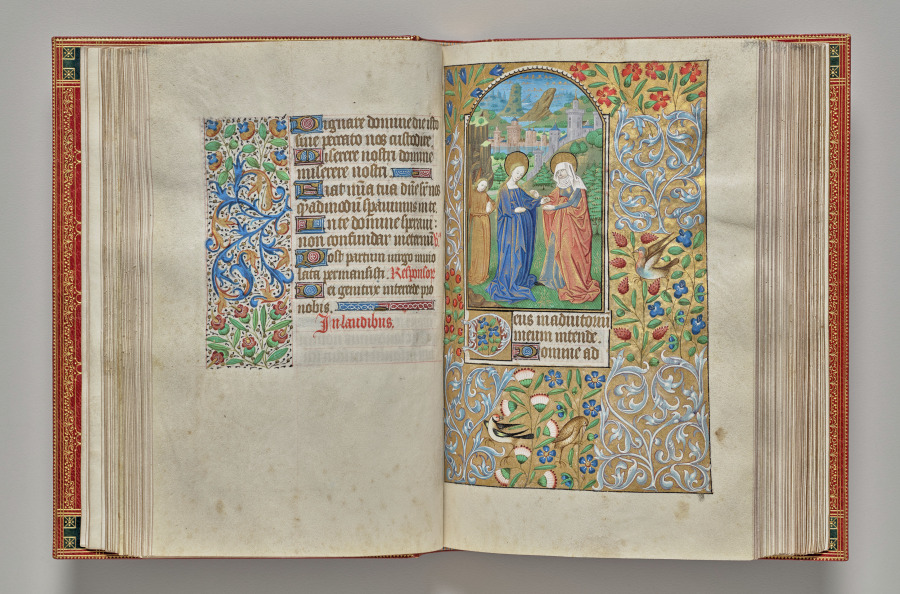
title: Book of Hours (Use of Rouen): fol. 38v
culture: France, Rouen, 15th century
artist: Master of the Geneva Latini (French, active Rouen, 1460–80)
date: c. 1470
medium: ink, tempera, and gold on vellum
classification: Bound Volume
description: In the late 1400s and early 1500s Rouen was an established and important center of book production. The city’s cathedral had a wealthy chapter that spent large sums of money to commission books and to maintain its extensive library. The stationers and booksellers would have likely been concentrated in or near the cathedral precinct. This artist, named after a manuscript now in Geneva, was Rouen’s principal illuminator during the second half of the 1400s.